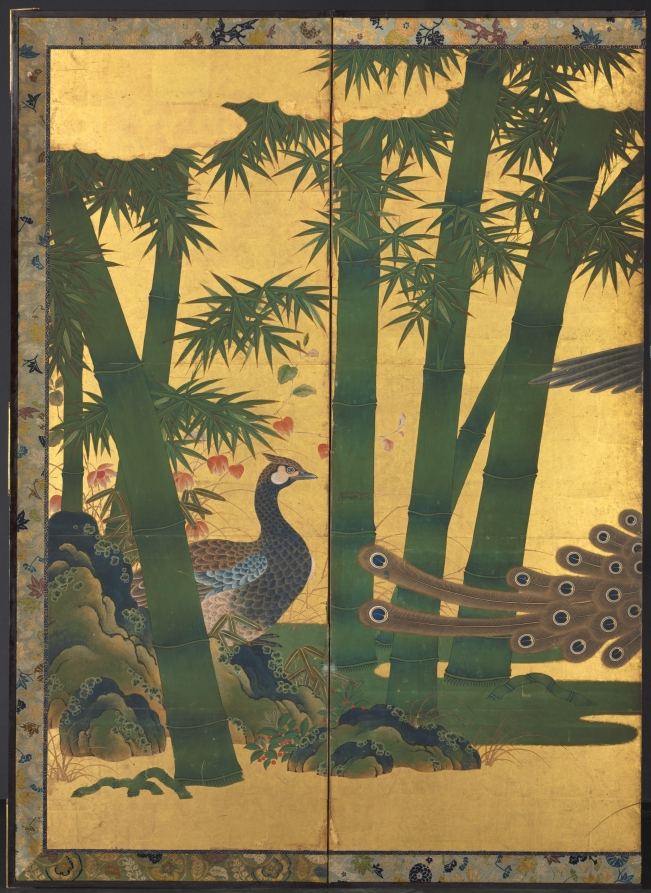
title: Peacocks and Bamboo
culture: Japan, Momoyama period (1573–1615)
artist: attributed to Tosa Mitsuyoshi (Japanese, 1539–1613)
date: late 1500s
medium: One of a pair of six-panel screens; ink, color, and gold on gilded paper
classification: Painting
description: The immense heraldic birds on display in these byøbu reflect the Momoyama era's spirit of newly gained self-confidence and an affinity for grand expressive statements in painting, architecture, the textile and ceramic arts, as well as garden design. While that period preceded the arrival of prosperity, it clearly marked an extra---ordinary moment in Japanese cultural history, one frequently compared with the twelfth century of the Heian period. Through the extensive use of gold-foil backgrounds rather than the somber palette of carefully orchestrated ink tones evident in Muromachi byøbu, patrons colla-borated with artists as well as craftsmen in fostering a decidedly new look in much of Japanese painting. Here for instance there is no imaginary vista suggesting China's vast waterways and mountain ranges. The setting is composed instead of highly stylized lozenges of mineral green paint, suggesting the earth from which clumps of grass, flowering plants, and towering bamboo and paulownia trees emerge. Clusters of lumpy, blue-green rocks dotted with lichen provide stabilizing three-dimensional foils for these islands of vegetation as well as the all-encompassing flat, golden surface. The glorious artificiality of the setting precisely serves the artist's effort to compose a credible yet other-worldly vista for depicting the legendary phoenix gazing across the landscape at the pair of peacocks. Rather than an emblem of immortality, as it is in Western lore, in Japan the phoenix evolved out of its origins in Chinese mythology to become, by the sixteenth century, an auspicious symbol of political authority. Together with clusters of the distinctively shaped paulownia leaves, this long-tailed, mythical bird graced lacquerware as well as mural paintings, proclaiming an air of graceful com-mand. A characteristic infusion of temporality has been included also, through a seasonal flowering schema extending from spring to early summer (right) to fall and the advent of winter (left). Although traditionally attributed to the Tosa school master Tosa Mitsuyoshi (1539-1613), these byøbu possess neither seals nor signatures to confirm that authorship. Known for his jewel-like, modest-sized album paintings of courtly narratives such as The Tale of Genji, it is likely both studio training and contemporary fashions in patronage conspired to produce a good number of such byøbu. This example from the Momoyama era represents one such effort from a masterful Tosa painter, too little seen in Western collections.